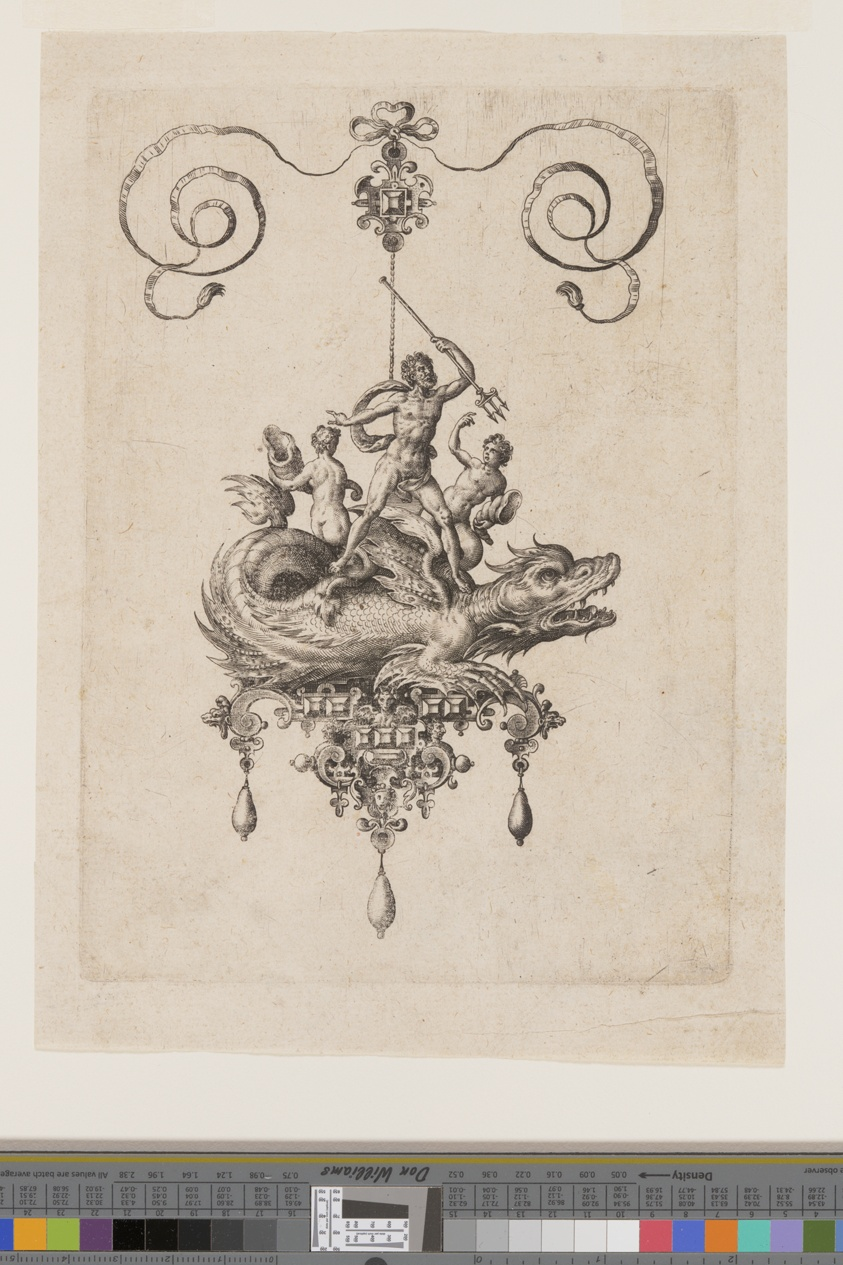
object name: Print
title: Designs for Pendants with Sea Monsters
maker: Adriaen Collaert (Flemish, c. 1560–1618); after Hans Collaert (Flemish, c. 1530–1581)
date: 1582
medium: Engraving on ivory laid paper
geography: Flanders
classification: engraving; paper; print; prints and drawing